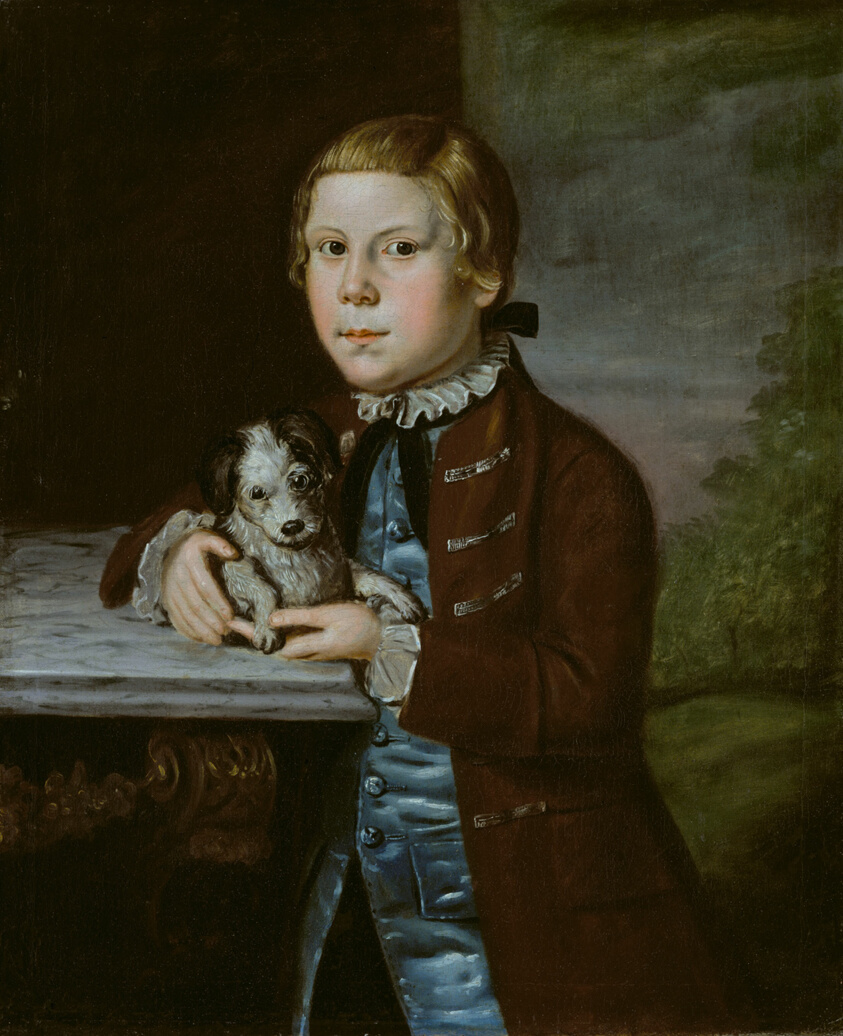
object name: Painting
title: Boy of Hallett Family with Dog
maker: Artist unknown (American, 18th century)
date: 1766–76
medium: Oil on canvas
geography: United States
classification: painting; american arts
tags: animals, children